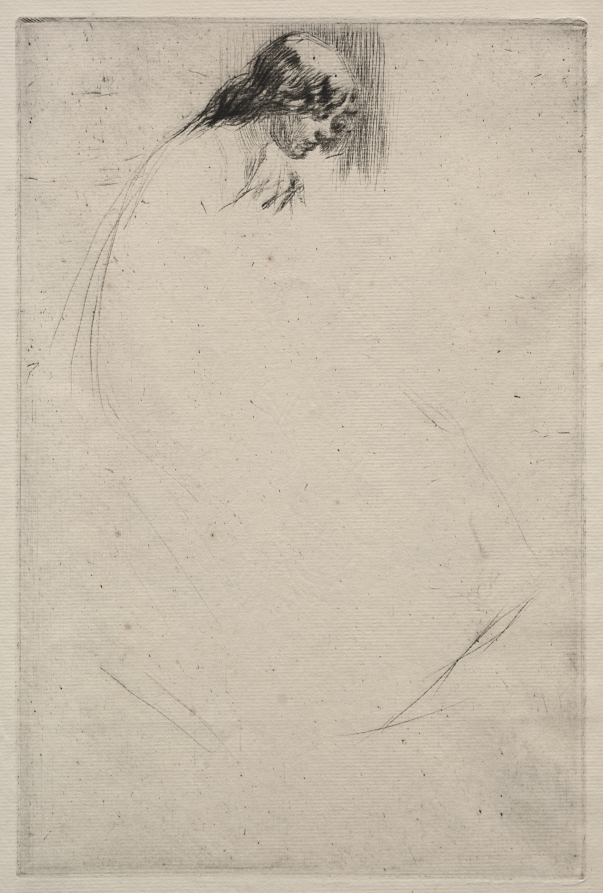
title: Jo's Bent Head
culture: America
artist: James McNeill Whistler (American, 1834–1903)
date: 1861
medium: drypoint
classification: Print